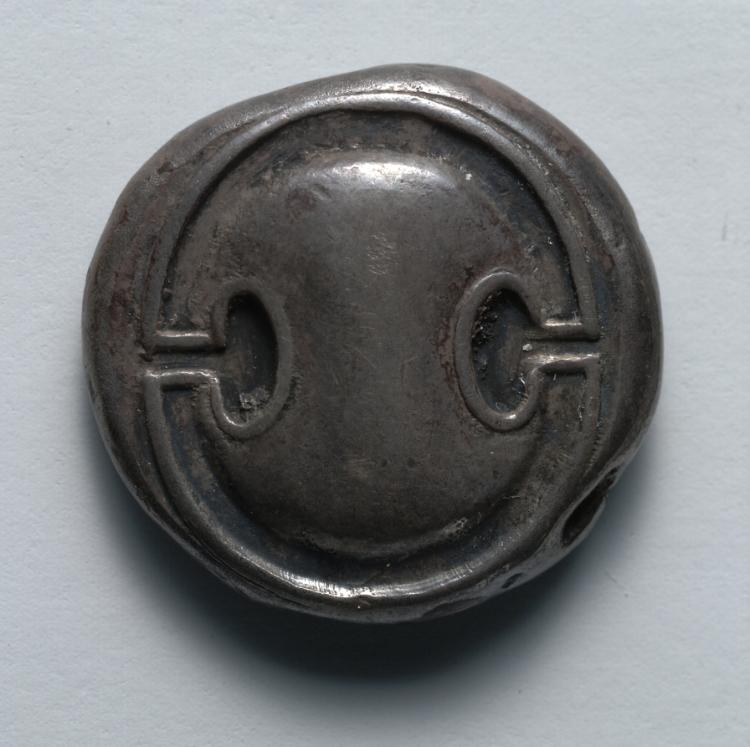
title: Stater: Boeotian Shield (obverse)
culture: Greek, minted at Thebes (Boiotia)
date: 379–338 BCE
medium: silver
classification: Coins